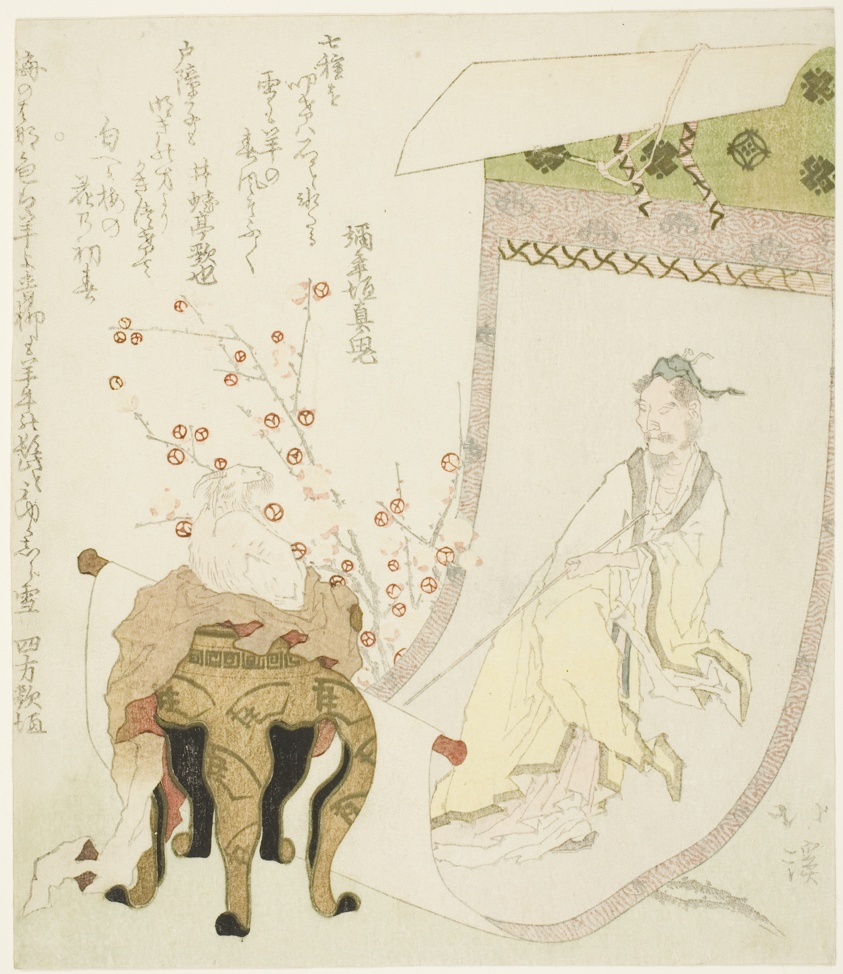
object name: Print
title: A painting of Daoist immortal Huang Chuping (Jp: Ko Shohei)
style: Japanese (culture or style)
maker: Totoya Hokkei (Japanese, 1780-1850)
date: 1823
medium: Color woodblock print; shikishiban, surimono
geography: Japan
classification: woodblock print; print; asian art